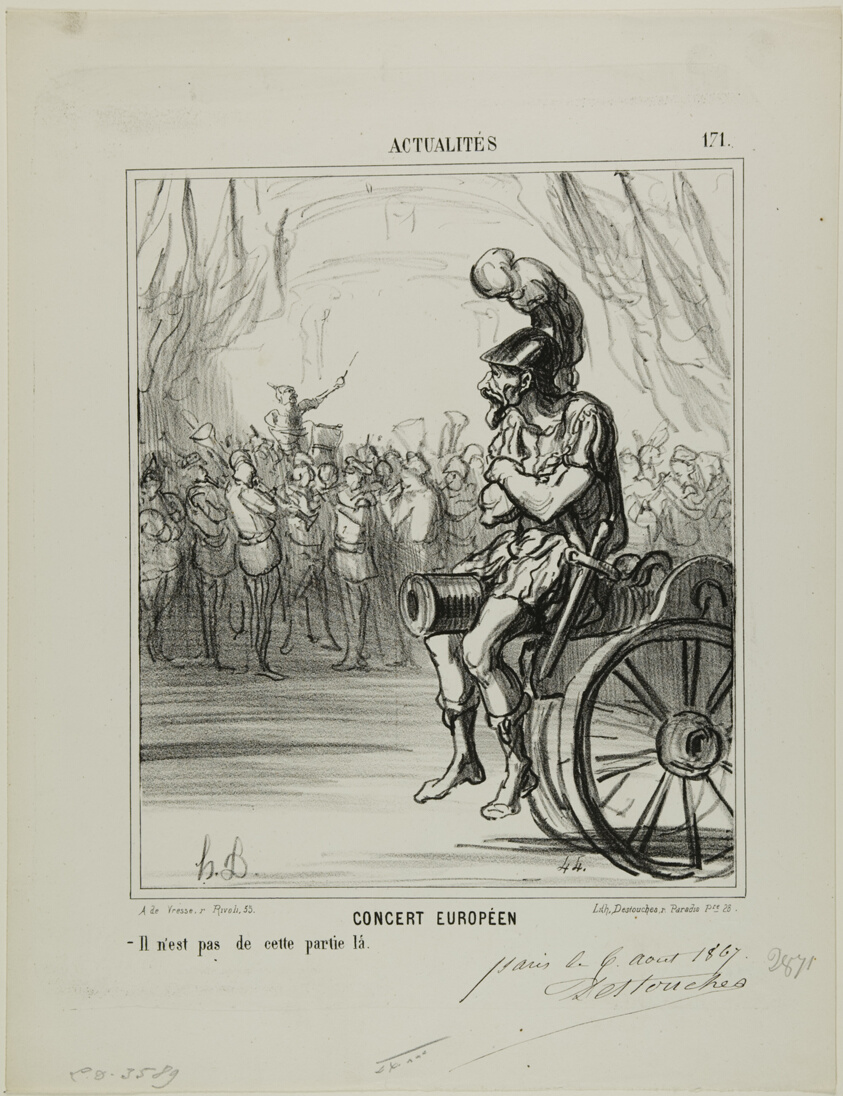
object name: Print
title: A European Concert. Not allowed to participate in this part, plate 171 from Actualités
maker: Honoré Victorin Daumier; French, 1808-1879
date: 1867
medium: Lithograph in black on white wove paper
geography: France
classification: lithograph; print; prints and drawing